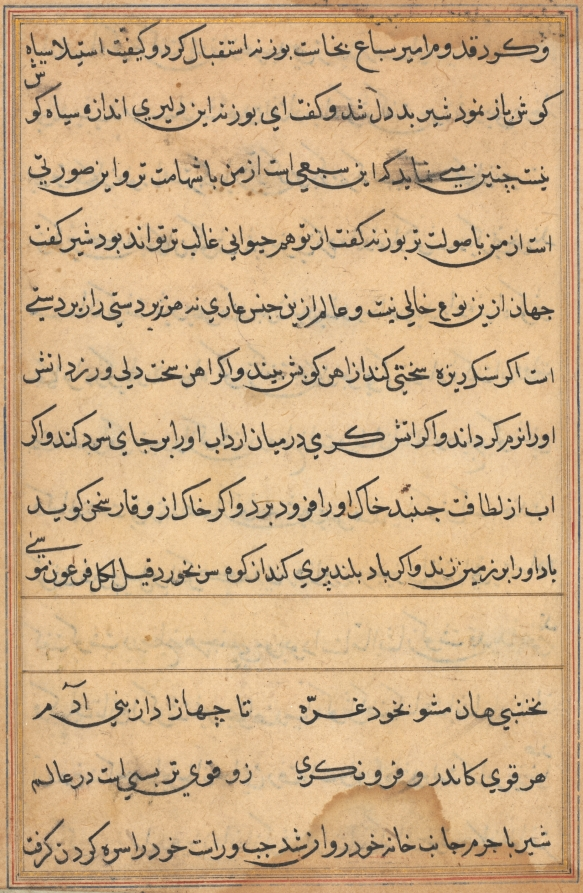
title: Page from Tales of a Parrot (Tuti-nama): text page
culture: Mughal India, court of Akbar (reigned 1556–1605)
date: c. 1560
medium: gum tempera, ink, and gold on paper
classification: Painting